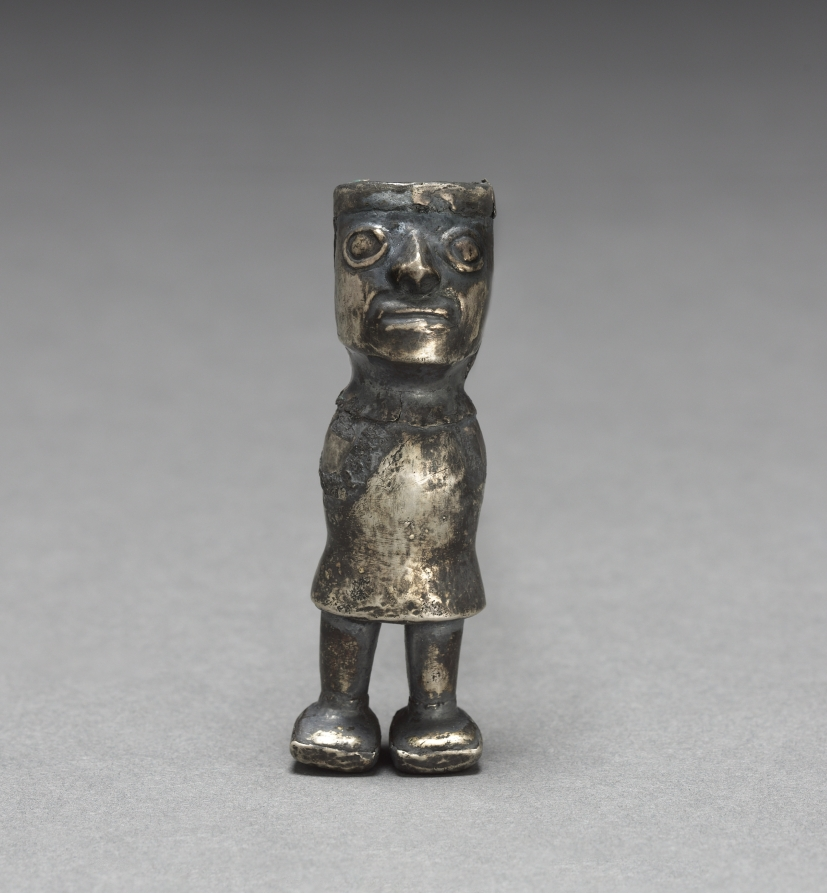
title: Figure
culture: Peru, Lambayeque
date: 1000–1532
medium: silver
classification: Metalwork